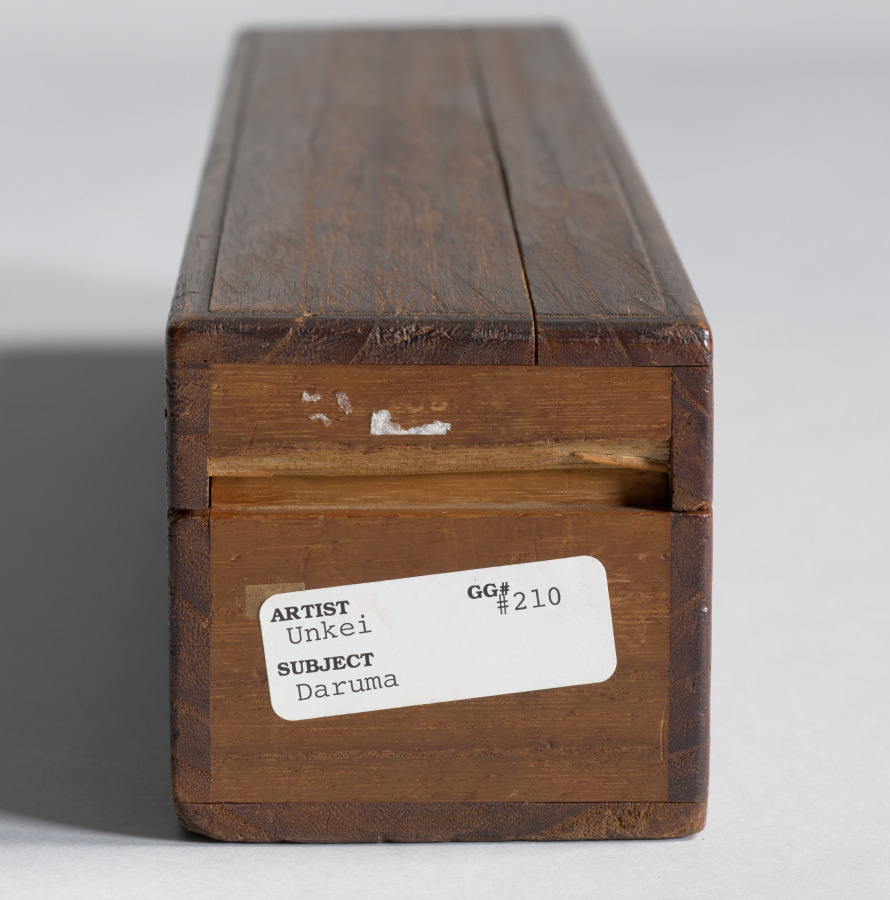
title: Bodhidharma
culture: Japan, Muromachi period (1392–1573)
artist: Unkei Eii (Japanese, active 1504–1520)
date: early 1500s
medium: hanging scroll; ink on paper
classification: Painting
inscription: signed: "Unkei" two-line inscription signed: Shunpō Sōki (1416-1496), 40th abbot of Daitokuji temple